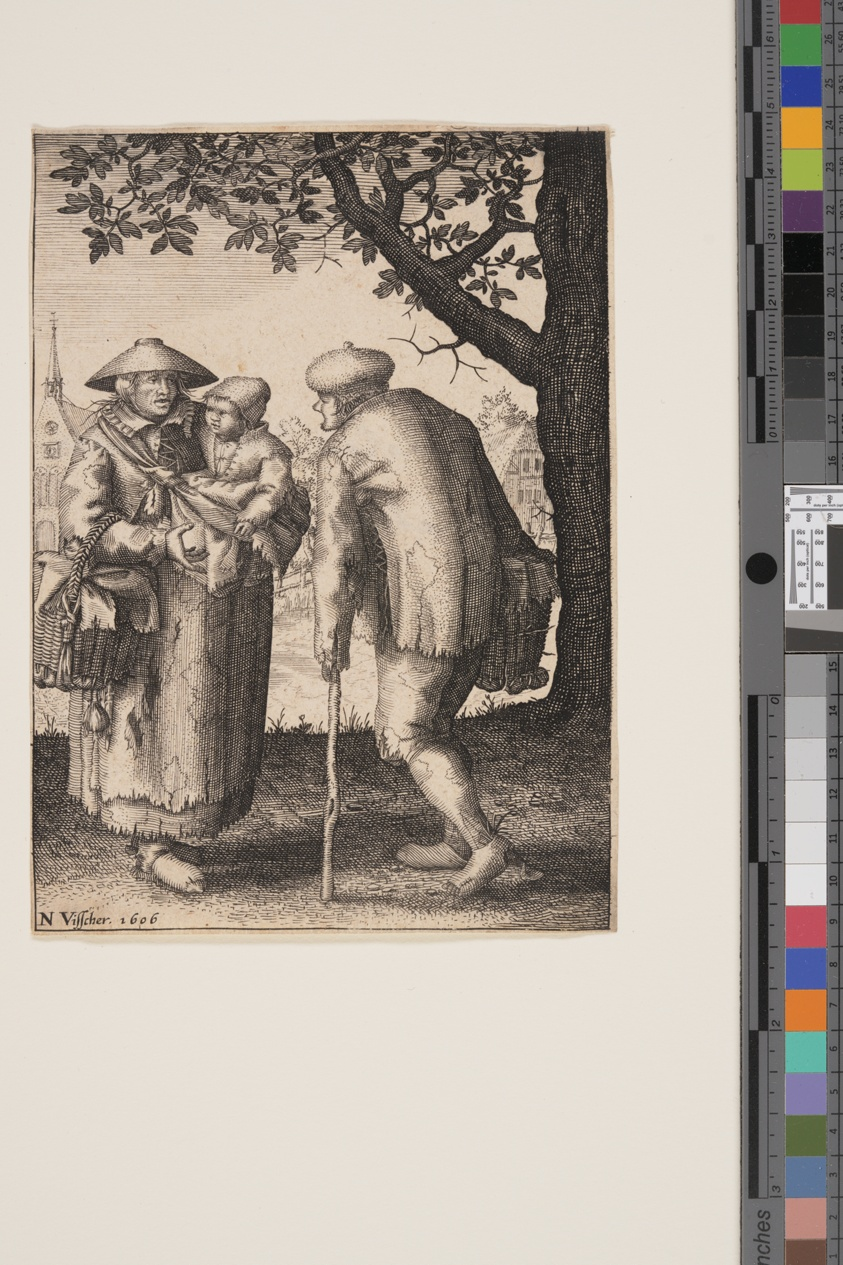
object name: Print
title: Peasant Family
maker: Claes Jansz. Visscher (Netherlandish, c. 1550–c. 1612); after David Vinckboons (Flemish, 1576-1632)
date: 1606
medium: Engraving on laid paper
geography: Netherlands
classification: engraving; paper; print; prints and drawing